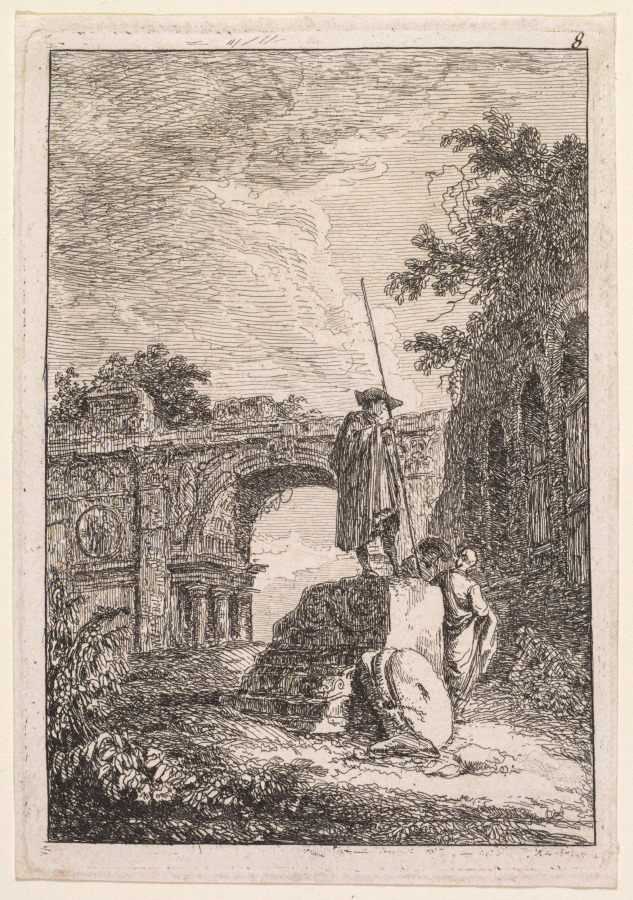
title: Les Soirées de Rome: L'Arc de triomphe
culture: France, 18th century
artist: Hubert Robert (French, 1733–1808)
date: 1763–64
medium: etching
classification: Print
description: Derived from his own pen-and-ink drawings, this suite of etchings features fictional characters situated near recognizable buildings and statues in Rome. On the title page, Robert dedicated the suite to Marguerite Le Compte, who visited Rome in 1764 in the company of the wealthy author and art enthusiast Claude Henri Watelet. Both Le Compte and Watelet were amateur etchers, and they socialized with a group that included artists and printmakers centered at the academies in Italy. Robert’s dedication was likely motivated by the hope of future patronage from Le Compte. She may be the generous woman with a hand muff depicted in The Ancient Temple, the fifth scene in this series.